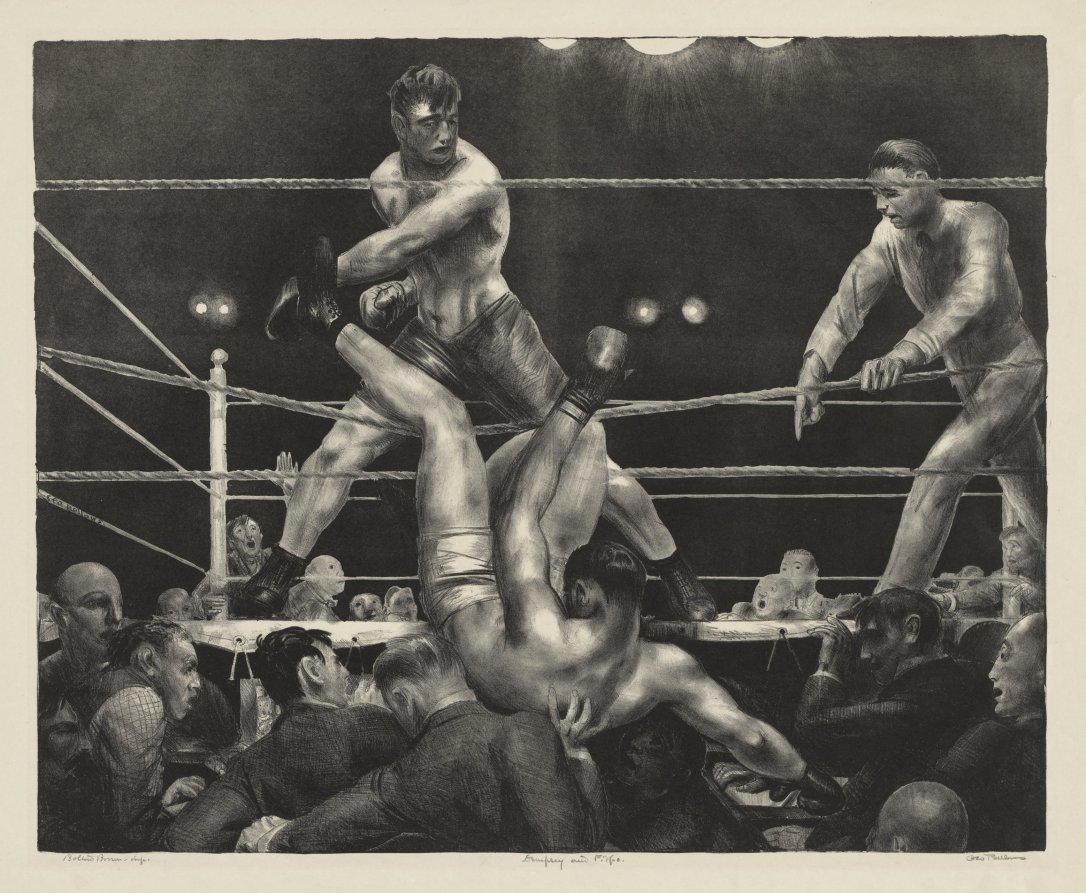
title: Dempsey and Firpo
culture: America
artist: George Bellows (American, 1882–1925)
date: 1924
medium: lithograph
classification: Print